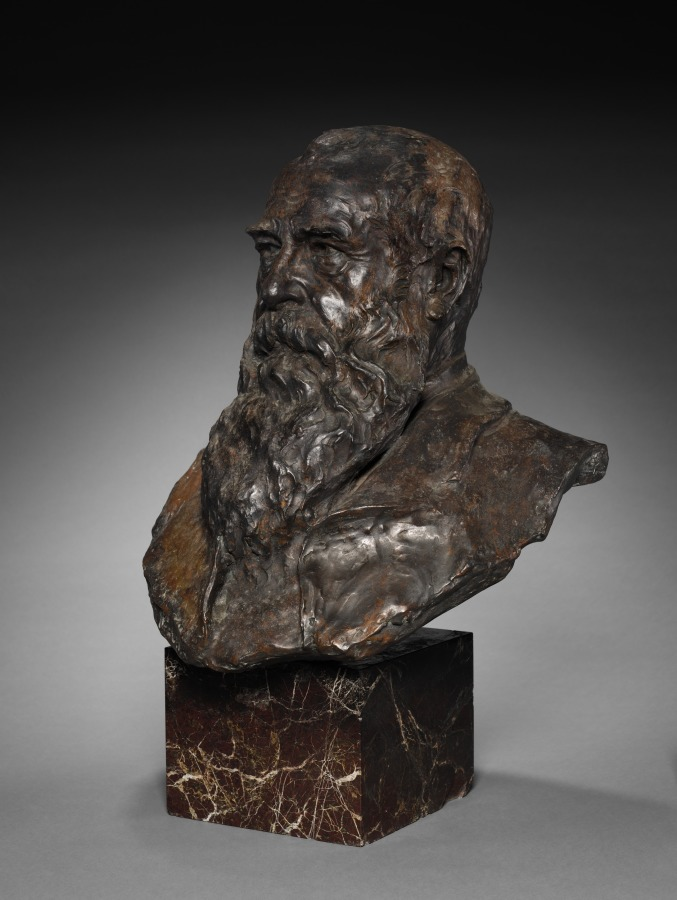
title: Claude Monet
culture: France, 20th century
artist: Paul Paulin (French, 1852–1937)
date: late 1800s-early 1900s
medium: bronze, marble base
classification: Sculpture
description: Paul Paulin was a renowned Parisian dentist who had a passion for sculpting and was encouraged by Edgar Degas to pursue an artistic career. Paulin is best known for his portrait busts of notable Impressionists. There are related versions of this portrait bust of the celebrated painter Claude Monet at three museums in Paris: the Petit Palais (plaster), the Musée d'Orsay (bronze), and the Musée Rodin (bronze).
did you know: In addition to Claude Monet, Paul Paulin also made portrait busts of Edgar Degas, August Renoir, Camille Pissarro, and Auguste Rodin.